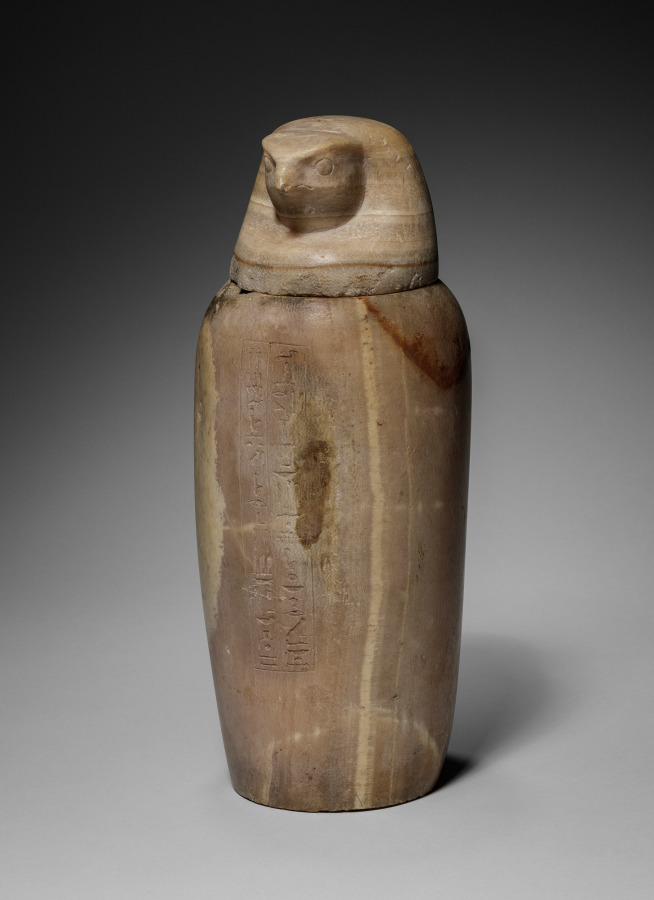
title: Canopic Jar with Falcon's Head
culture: Egypt, Late period (715–332 BCE), Dynasty 26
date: 664–525 BCE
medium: travertine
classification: Funerary Equipment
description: In the process of mummification, the liver, lungs, stomach, and intestines were removed, separately embalmed, and stored in specialized jars known as canopic jars (after a sailor in Greek mythology, who died at the town of Canopus in the Nile Delta and was worshipped there in the form of a human-headed jar). Each organ was identified with one of four funerary deities collectively known as the Sons of Horus: the liver with Imsety (man's head), the lungs with Hapy (baboon's head), the stomach with Duamutef (jackal's head), and the intestines with Qebehsenuef (falcon's head). It was their duty to protect the deceased and restore to him his body parts in the hereafter.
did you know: The falcon-headed deity Qebehsenuef protected the contents of this canopic jar. It contained the remains of the deceased's intestines, which were kept safe for the afterlife.